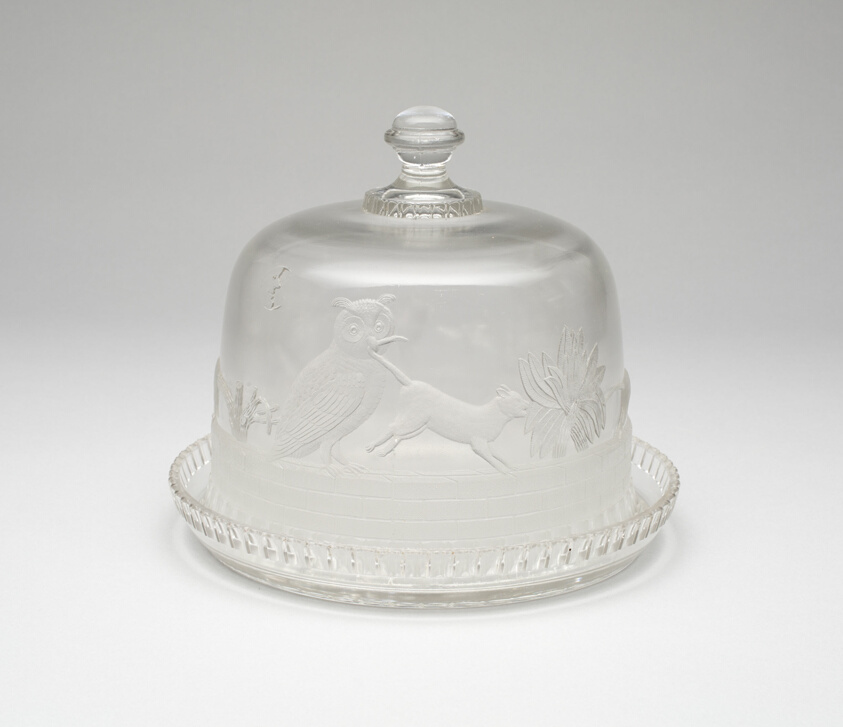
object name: Glass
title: "Owl and Pussycat" covered tray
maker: Artist unknown (American, 19th–20th century)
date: 1870–1900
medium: Glass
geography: United States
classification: dish (vessel); glass; american decorative arts; american arts; decorative arts